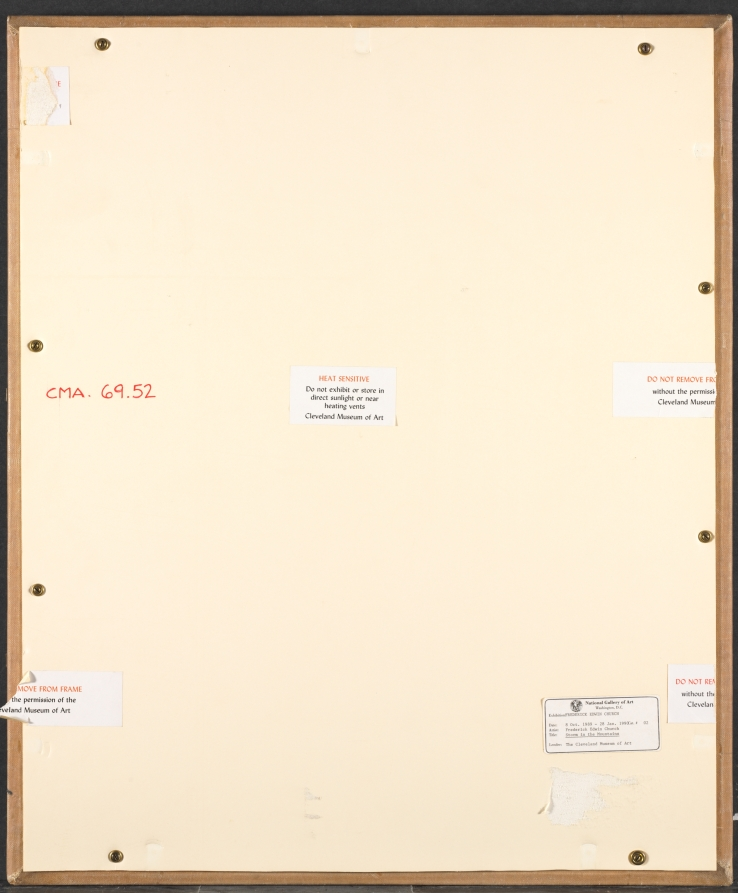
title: Storm in the Mountains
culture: America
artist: Frederic Edwin Church (American, 1826–1900)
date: 1847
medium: oil on canvas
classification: Painting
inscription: Signed in center on tree: "F. CHURCH. 1847"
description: Dominating this composition is a lightning-blasted tree embodying nature's awe-inspiring power and endless cycle of life and death. A popular motif because of these associations, the blasted tree was favored by many landscape painters like Church, who prominently featured it here.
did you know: Church's spectacular home and studio, named Olana, is preserved as a New York State Historical Site.